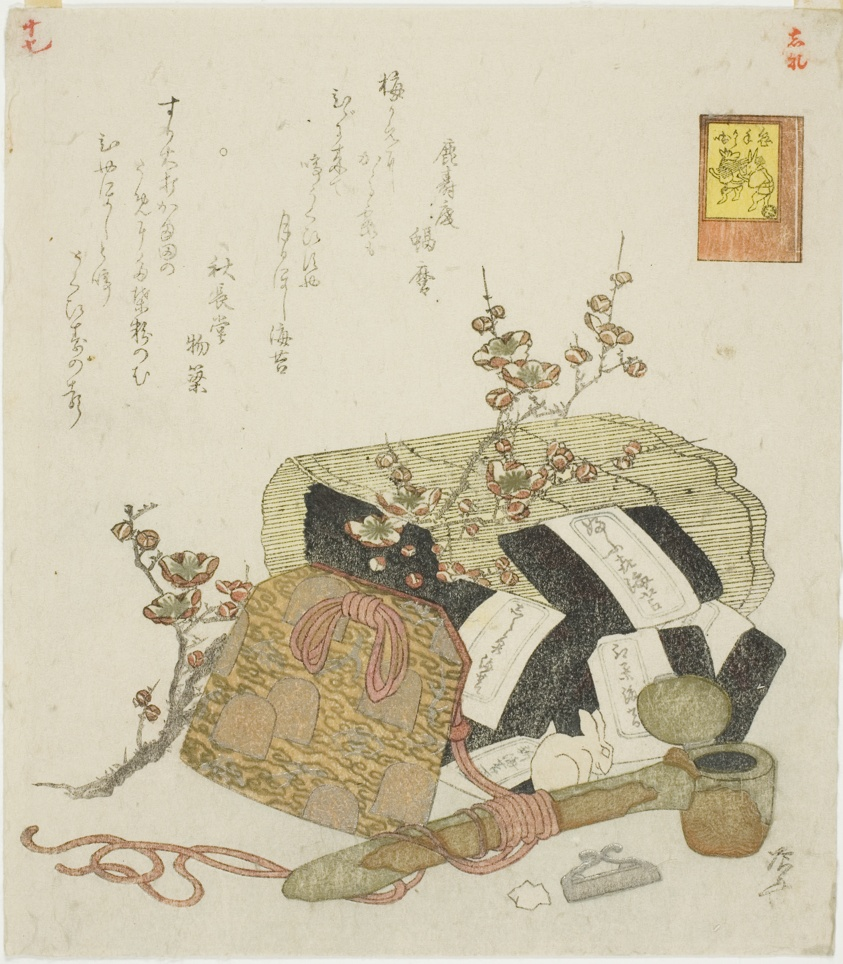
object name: Print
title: Seaweed, portable writing case, and plum branch, no. 5 from the series "The Rabbit's Boastful Exploits (Usagi tegarabanashi)"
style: Japanese (culture or style)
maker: Ryuryukyo Shinsai (Japanese, c. 1764-1820)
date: 1819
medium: Color woodblock print; shikishiban, surimono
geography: Japan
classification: woodblock print; print; asian art